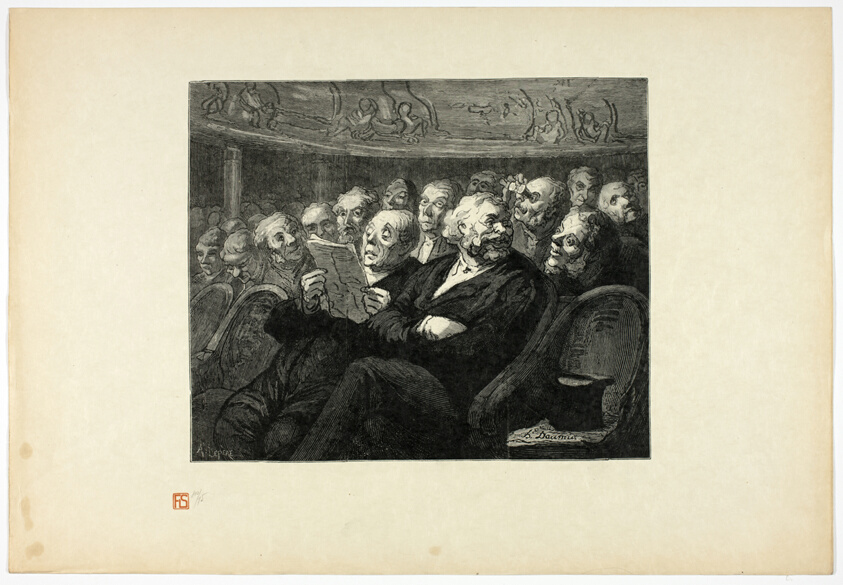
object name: Print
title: Fauteuils d'orchestre, from Tirage Unique de Trente-Six Bois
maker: Louis Auguste Lepère (French, 1849-1918); after Honoré Victorin Daumier (French, 1808-1879); printed by François Louis Schmied (Swiss, 1873-1941); published by Jules Meynial (French, 20th century)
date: 1878, printed 1920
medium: Wood engraving on cream Japanese paper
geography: France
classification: wood engraving; print; prints and drawing